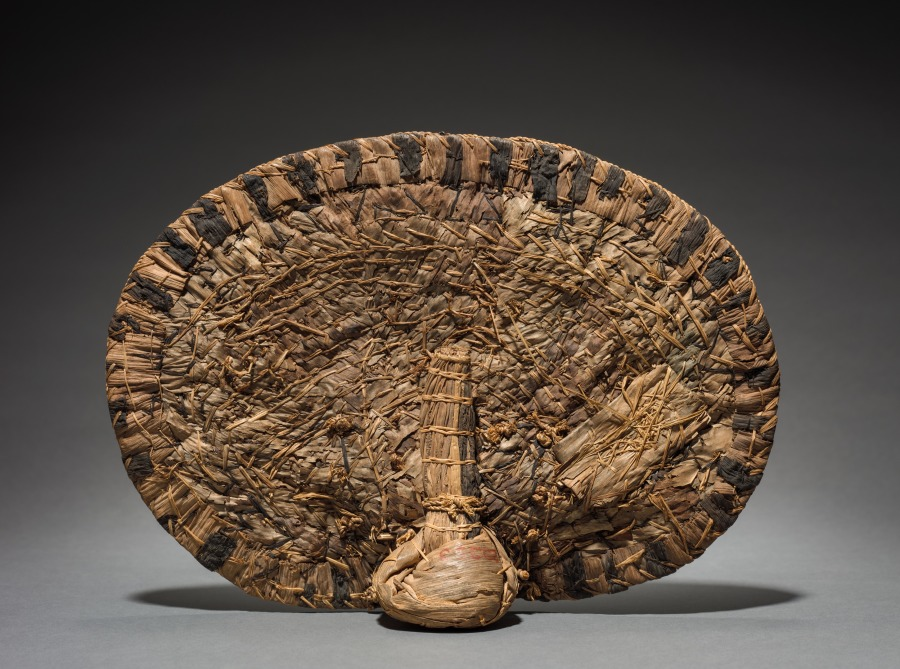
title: Back Skirt/Sitting Pad (negbe)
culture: Africa, Central Africa, Democratic Republic of Congo, Mangbetu-style makers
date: by 1928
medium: Plant fibers and dye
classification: Garment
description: Egbe (singular: negbe) were fashionable and practical garments aristocratic Mangbetu women made for special occasions. Worn over a skirt, it tied onto a girdle along with a frontal “apron.” The curved interior piece rested on the lower back. Thickly woven, flexible natural fibers bent with the body, cushioning the wearer’s behind when sitting. When the woman was standing, the decorated flat portion faced outward, showing off bold geometric motifs. Egbe were among items sold to foreigners at the Mangbetu king’s encouragement as the Mangbetu actively constructed their self image for outsiders during the 1920s and 1930s.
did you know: A curved "handle" on the negbe's interior allowed it to rest on the tailbone.